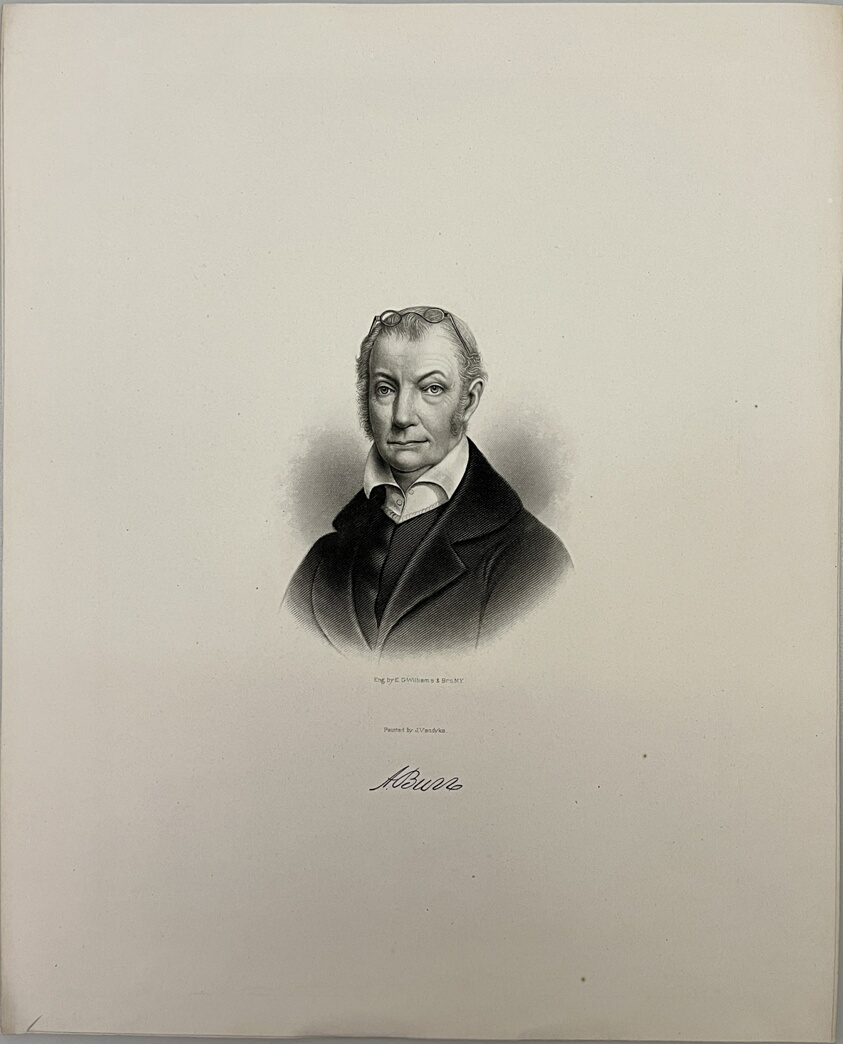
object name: Print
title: Aaron Burr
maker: E. G. Williams and Bro. (American, 19th century); after James Van Dyck (American, active 1834-1843)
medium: Stipple and line engraving on paper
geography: United States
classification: reproduction; print; prints and drawing